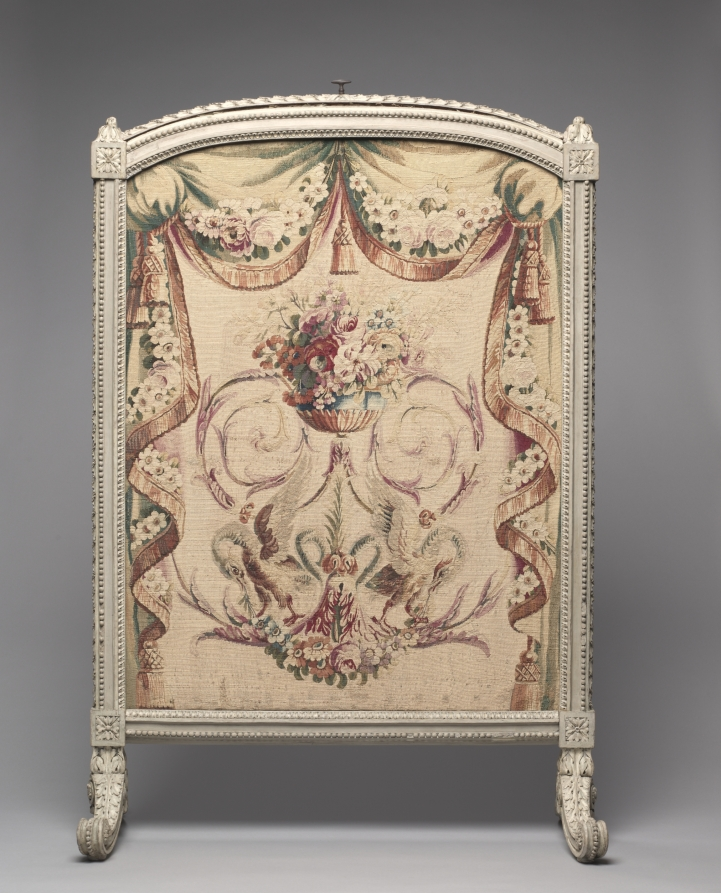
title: Fire Screen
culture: France, Paris, style of Louis XVI, 18th century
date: c. 1785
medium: carved and painted wood with tapestry panel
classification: Furniture and woodwork